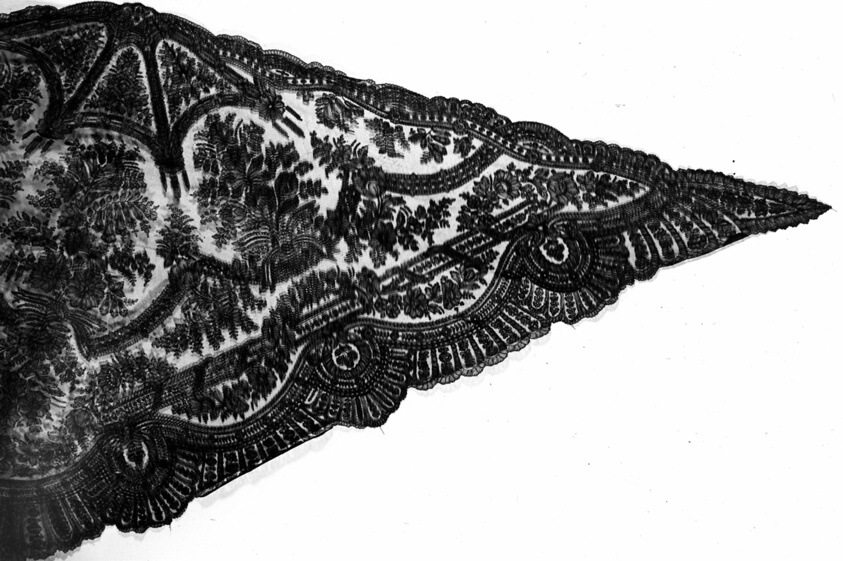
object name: Textile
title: Half Shawl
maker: France, probably Bayeux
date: 1855/65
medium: Silk, bobin straight lace (made in horizontal strips)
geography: France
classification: textile; lace - bobbin